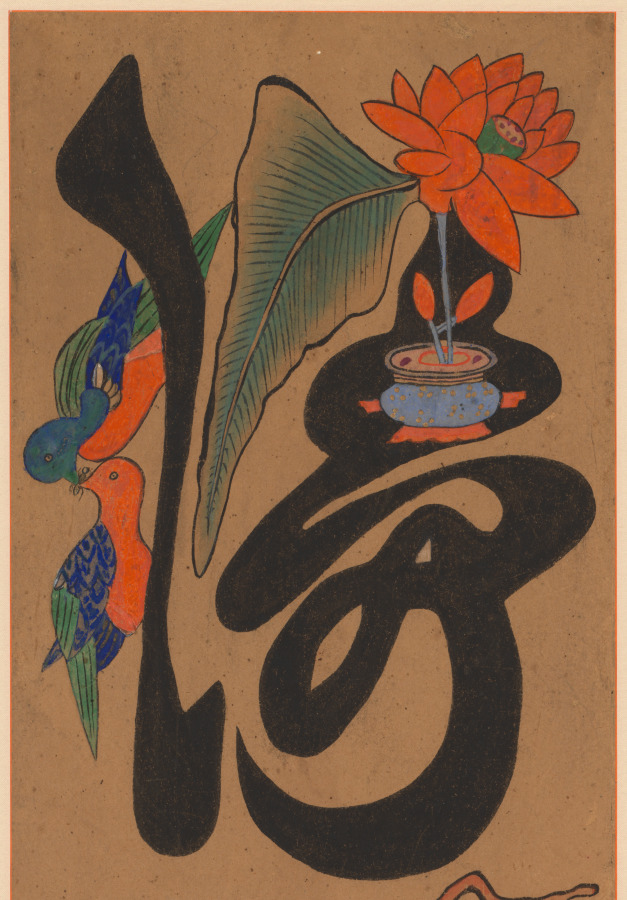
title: Munja-Chaekgeori Screen (Character-Books Screen)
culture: Korea, Joseon dynasty (1392–1910)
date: early 1900s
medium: Eight-panel folding screen, ink on paper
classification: Painting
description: This folding screen is a whimsical harmony of two different subjects: chaekgeori, or books and things; and munja, or characters. The lower section of each panel depicts the imagery of things, including books, decorative arts, and utilitarian objects. The upper portion of each panel bears a classical Chinese character. Read from far right to left, the eight characters refer to the values of Confucian teachings of the Joseon dynasty: filial piety, brotherly love, loyalty, trust, propriety, righteousness, modesty, and humility. While these two pictorial genres are harmoniously conjoined on the same picture plane, two sharply contrasting world views—urban consumerism and traditional Confucian ethics that despise materialism—compete with one another.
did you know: The eight Korean characters each mean filial piety, brotherly love, loyalty, trust, propriety, righteousness or justice, modesty or integrity, and humility or the feeling of shame.